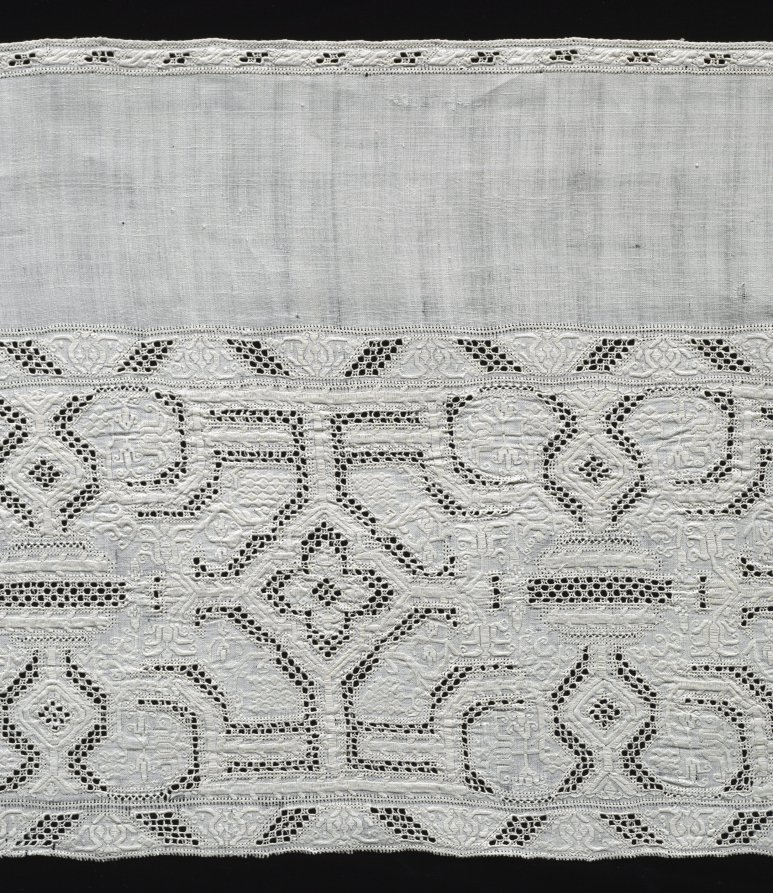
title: Lace Panel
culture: Italy, Padua and Venice, 16th century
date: 1560–99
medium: Linen: needle lace (cutwork) and bobbin lace edging and embroidery (satin stitch [Punto Reale])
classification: Lace